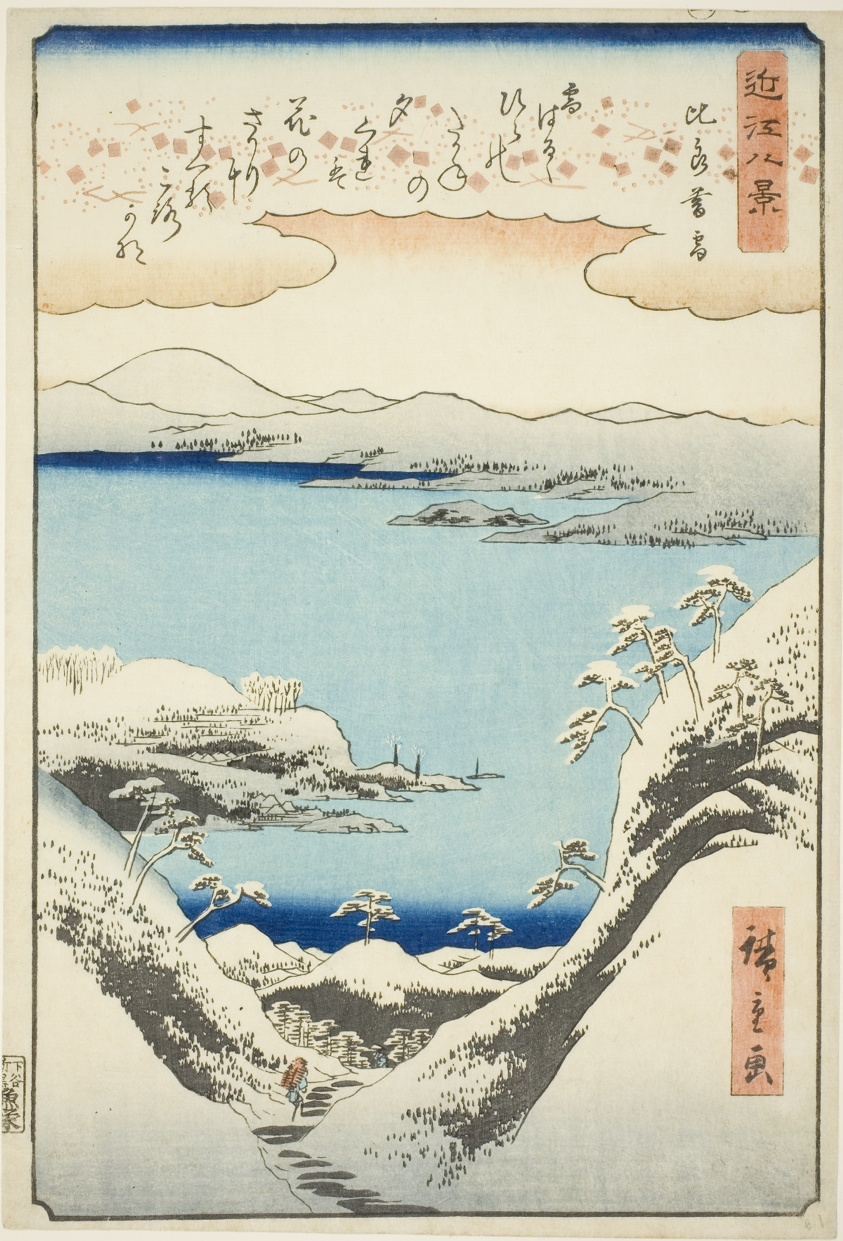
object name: Print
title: Evening Snow at Hira (Hira bosetsu), from the series "Eight Views of Omi (Omi hakkei)"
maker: Utagawa Hiroshige 歌川 広重; Japanese, 1797-1858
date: 1857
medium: Color woodblock print; oban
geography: Japan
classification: woodblock print; print; asian art